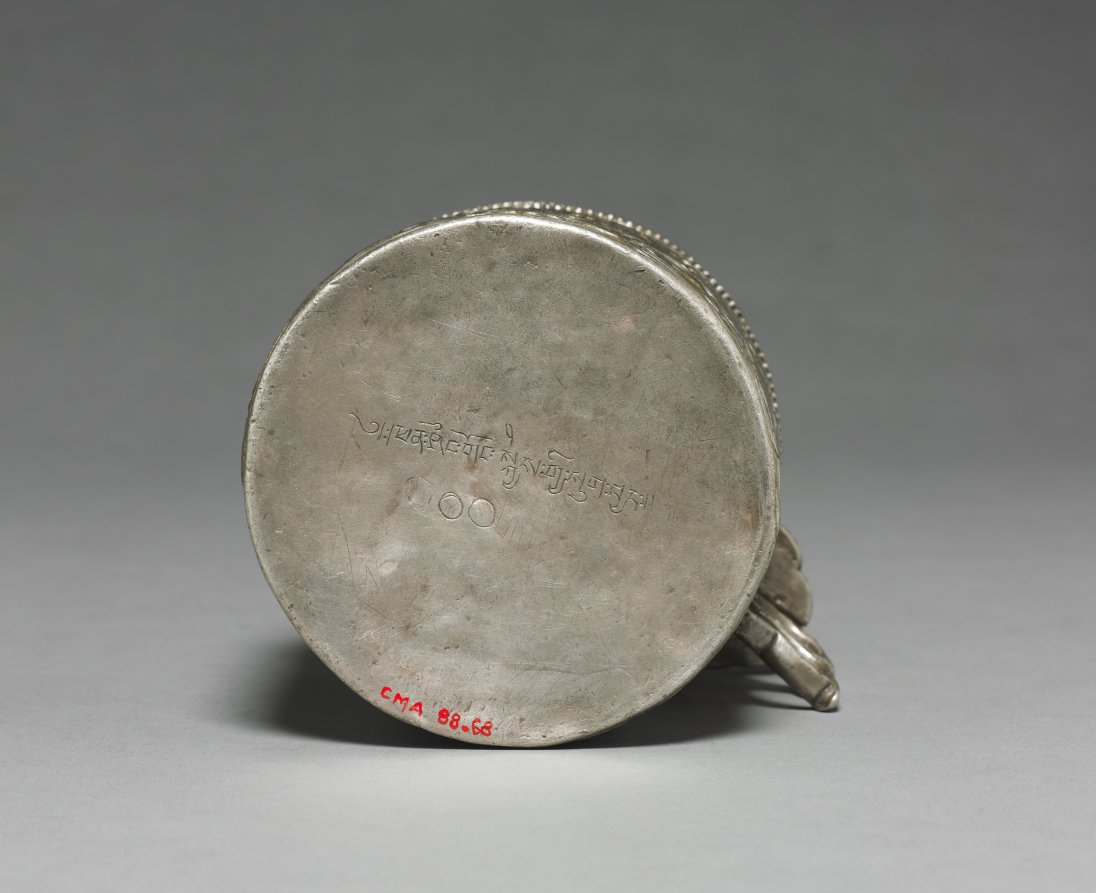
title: Beaker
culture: Central Asia (Sogdiana) or Tibet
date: c. late 600s–early 700s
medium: silver with gilding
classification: Silver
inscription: Inscribed on bottom of the cup: "Phan shing gong skyes gui sug byad (or byang)"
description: The circular shapes of the cup’s handle feature a flat edge on which the user rested their thumb for better grip, a design characteristic of silver objects made during the 700s by Sogdian artists, who traveled from Central Asia along international trade routes. An ownership inscription in Tibetan script on the underside of the cup identifies the vessel as a personal possession. The circles and lines carved below this inscription are likely measurements recording the weight of the silver used for the cup.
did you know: This cup depicts two lions and a lionlike animal with horns!